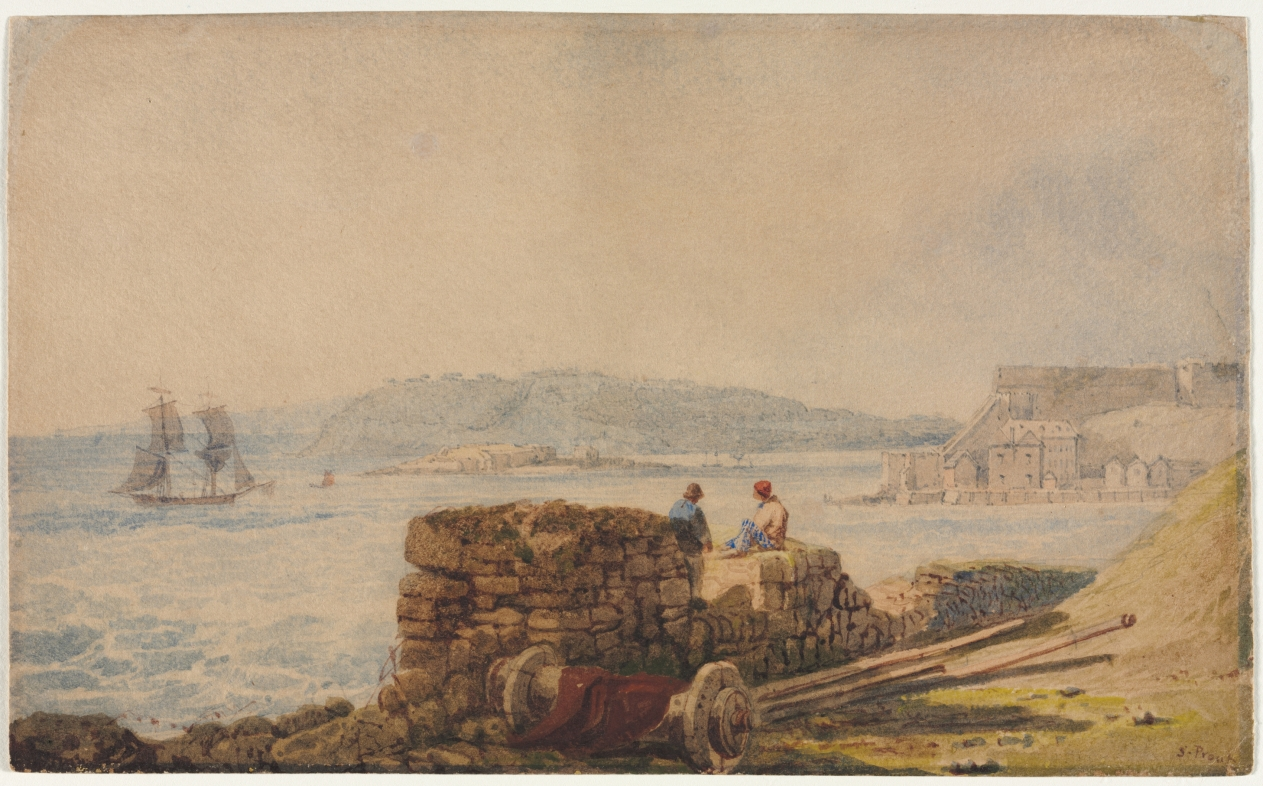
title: Drake's Island, Plymouth Sound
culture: England, 19th century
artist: Samuel Prout (British, 1783–1852)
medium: watercolor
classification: Drawing